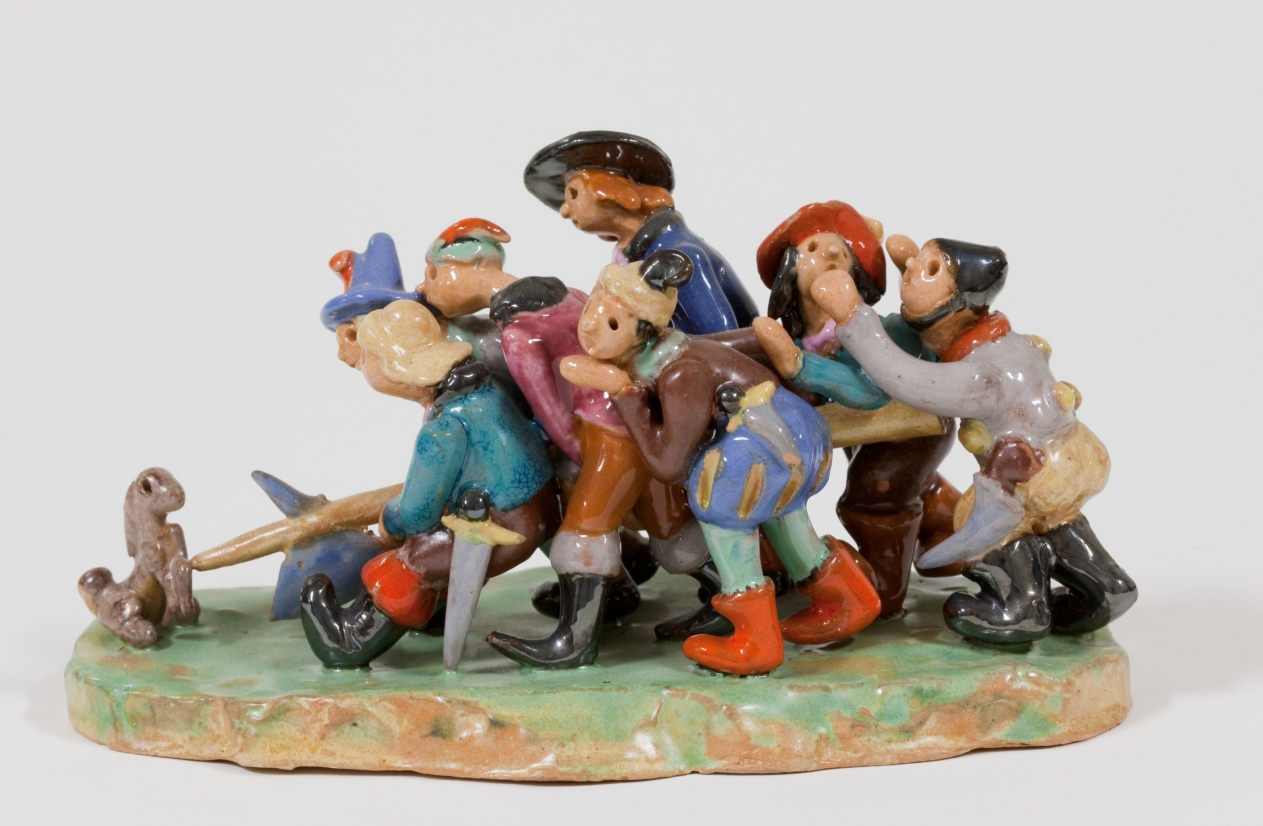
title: Hunting Group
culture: Austria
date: 1900s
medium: ceramic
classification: Ceramic